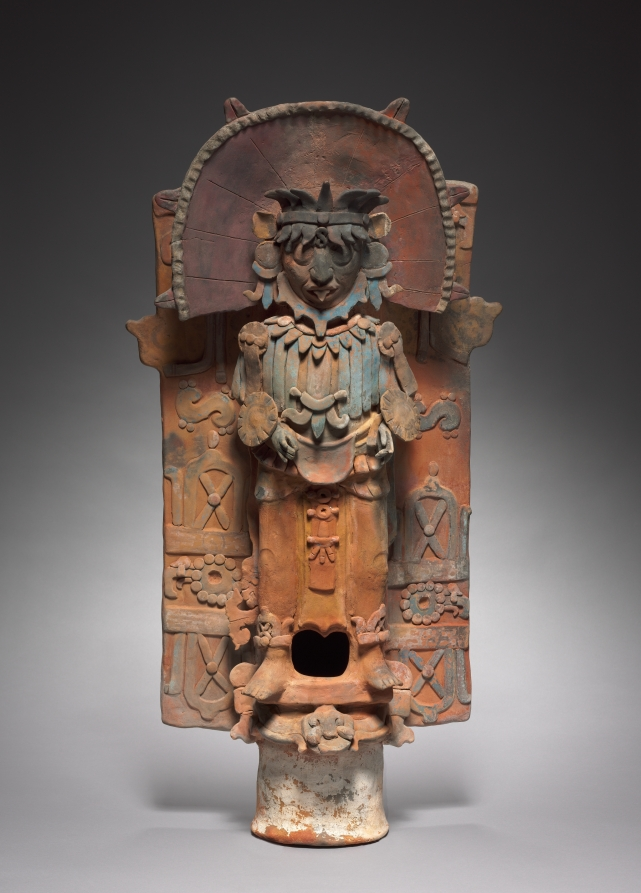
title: Incensario (Incense Burner) Support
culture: Mesoamerica, Maya, Palenque region, Classic Period (250-900) or modern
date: 600–900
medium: earthenware with pigments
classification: Sculpture